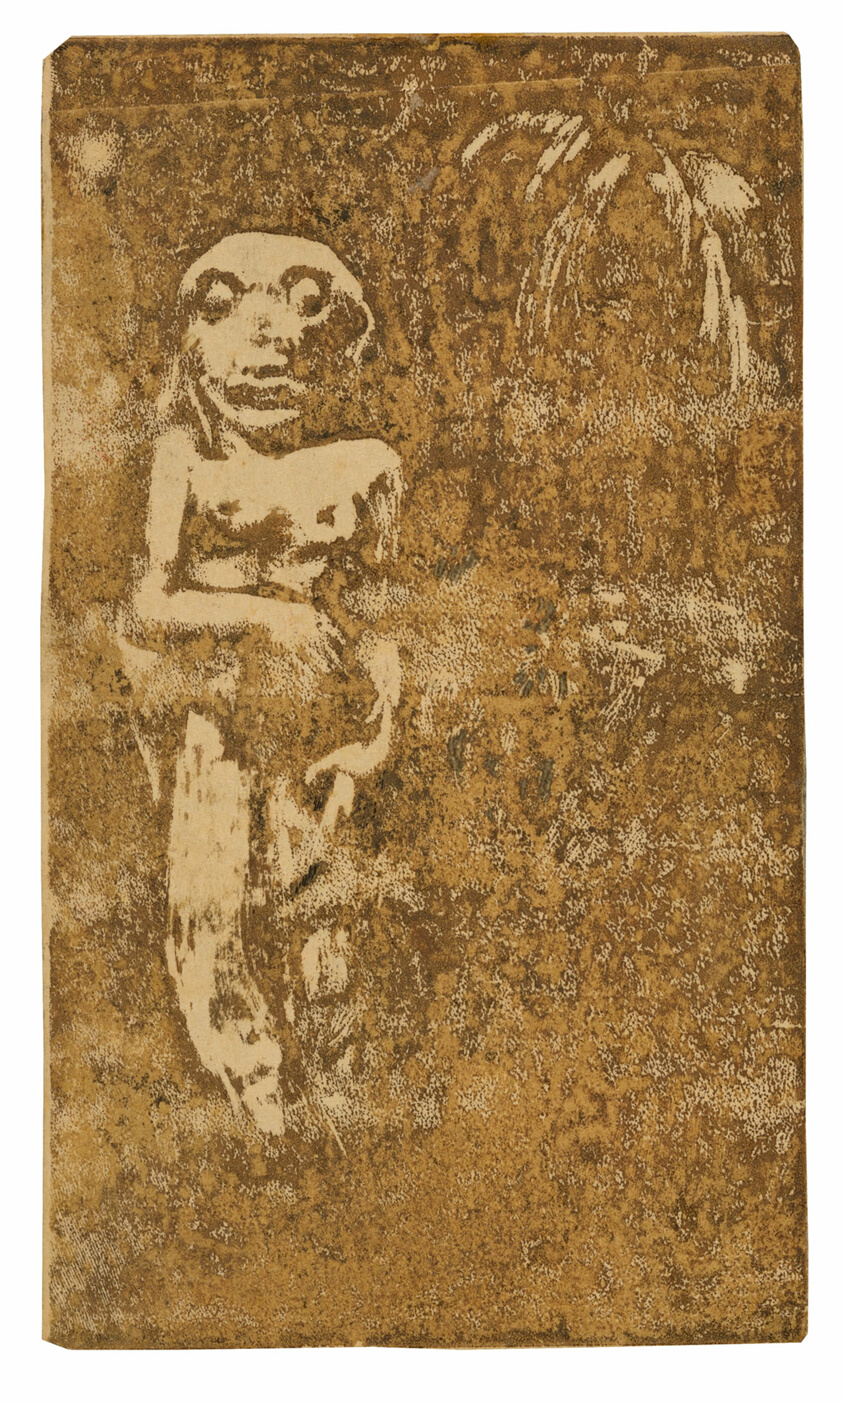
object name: Print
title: Oviri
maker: Paul Gauguin (French, 1848-1903)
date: 1894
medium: Wood-block print, printed twice in deep-yellow ocher and brown ink, with touches of black watercolor, on cream wove paper (an imitation Japanese vellum), mounted on mottled blue wove laminate card (recto); wood-block print in black ink over red ink tone block, and brush and solvent-thinned orange wash, on cream wove paper (an imitation Japanese vellum) mounted on mottled blue wove laminate card (verso)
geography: France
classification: woodcut; print; prints and drawing